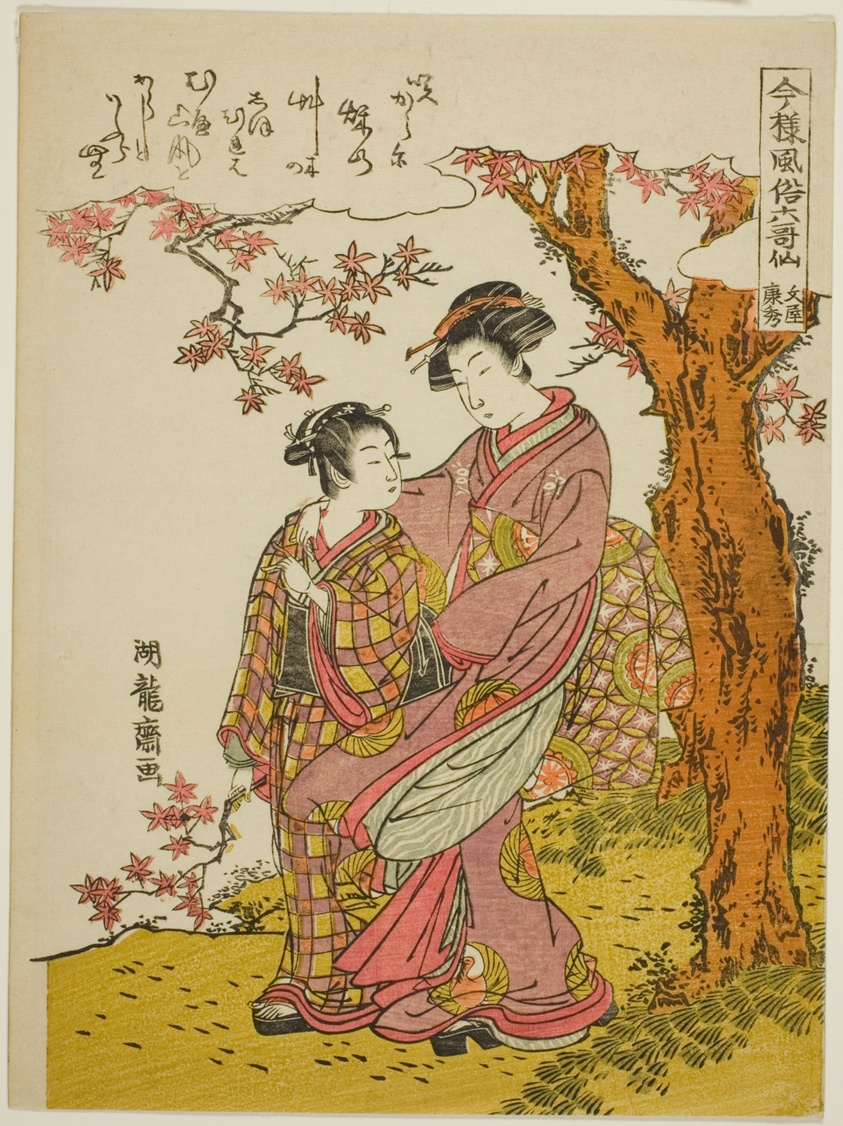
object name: Print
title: Poem by Bun'ya no Yasuhide, from the series "Modern Versions of the Six Immortal Poets (Imayo fuzoku rokkasen)"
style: Japanese (culture or style)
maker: Isoda Koryusai (Japanese, 1735-1790)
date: c. 1776/81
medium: Color woodblock print; chuban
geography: Japan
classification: woodblock print; print; asian art